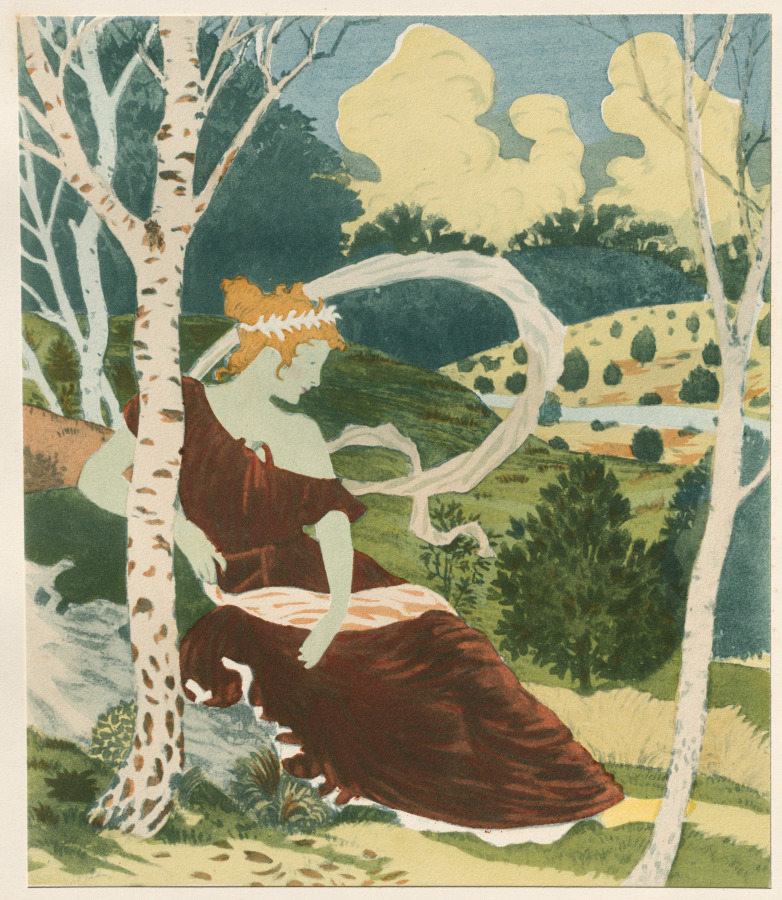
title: Dans les Bois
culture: France, 19th century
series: L'Estampe Moderne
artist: Eugène Grasset (French, 1841–1917)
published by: Imprimerie Champenois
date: 1899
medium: Color lithograph from bound volume containing 50 lithographs, each with a tissue paper guard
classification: Bound Volume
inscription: lower right corner of secondary support: blindstamp of l'Estampe Moderne (Lugt 2790)